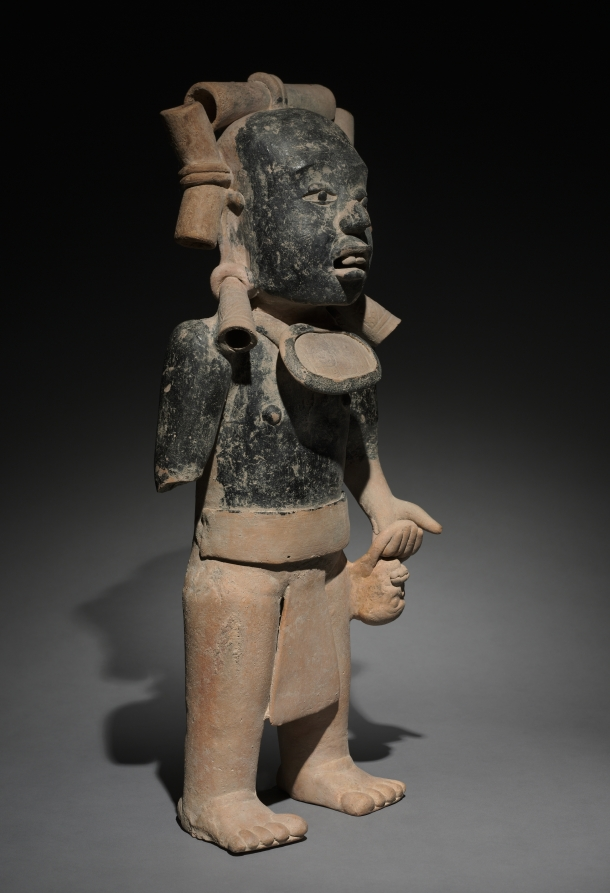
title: Standing Male Figure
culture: Mexico, Gulf Coast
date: 300–900 CE (thermoluminescence date, 240–945 CE)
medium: earthenware, asphalt and resin paint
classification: Sculpture